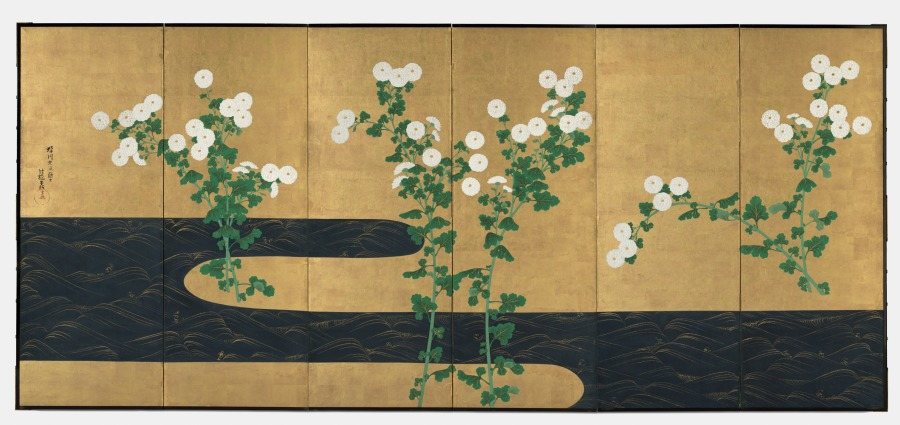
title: Chrysanthemums by a Stream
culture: Japan, Edo period (1615–1868)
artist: possibly by Ogata Kōrin (Japanese, 1658–1716)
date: c. 1715–30 or after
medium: One of a pair of six-panel folding screens; ink and color on gilded paper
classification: Painting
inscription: the signature and seal of Korin, "sensen mappa (makko) inshi hokyo Korin" (late generation hermit of the Kamo stream tradition) is written in two lines. A circular seal which reads "Hoshuku" is at the end of the second line on the edge of the first panel from the right.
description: These screens recall a painting style so closely identified with Ogata Kōrin (1658–1716) that it is called Rinpa, or “Rin School,” after the ideograph “rin” in his name. The highly stylized background accentuates floral groupings that have been groomed so as to appear utterly artificial, like the synthetic arrangements available today. Kōrin's genius derived in large measure from natural phenomena painstakingly observed and then manipulated to create compositions of startling refinement and sparkling isolation. This process may have grown out of Kōrin's early immersion in the family textile business, a medium that encourages such dramatic distillations of form: the stream's gold-crested waves bring to mind traditional kimono robe designs of Kōrin's era. Works with the signature seen on this painting, including a style name, or persona suggested to Kōrin by his brother Kenzan (1663–1743), are sometimes considered to have been produced either in the last year of his life, when he was very ill, or after his death. In both scenarios, the lion’s share of the work would have been done by studio assistants, but little is truly known of his studio practice. Given the regularity of the gold waves on the stream, and the tension in the arrangement of the chrysanthemums, it is also possible that the screens were made in emulation of Kōrin's designs by a later artist.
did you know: The signature used on these screens may indicate paintings made in the last year of the artist's life, or works completed by his studio after his death.